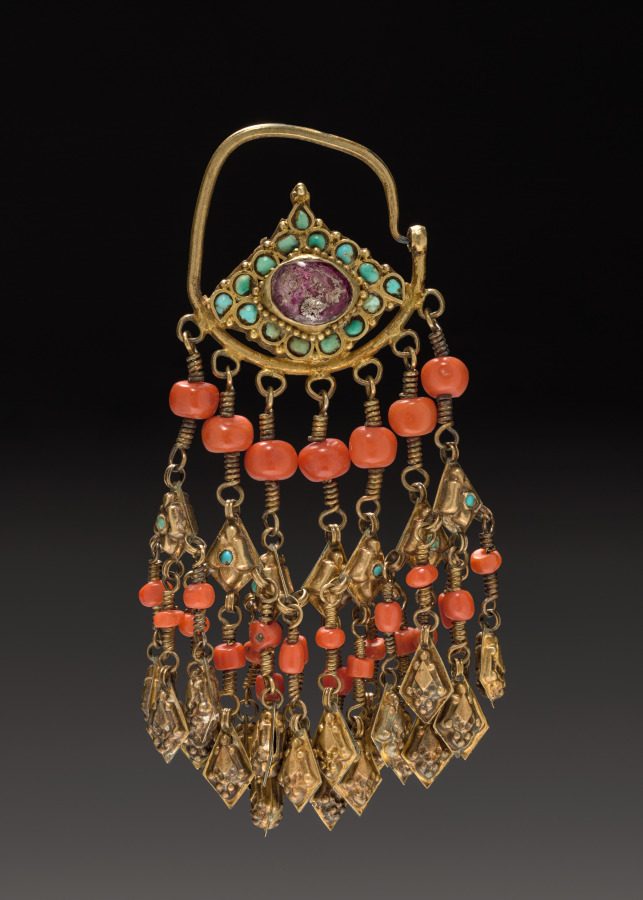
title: Nose Ring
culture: Nepal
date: 1700s–1800s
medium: silver, gilded; turquoise, coral and red glass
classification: Jewelry